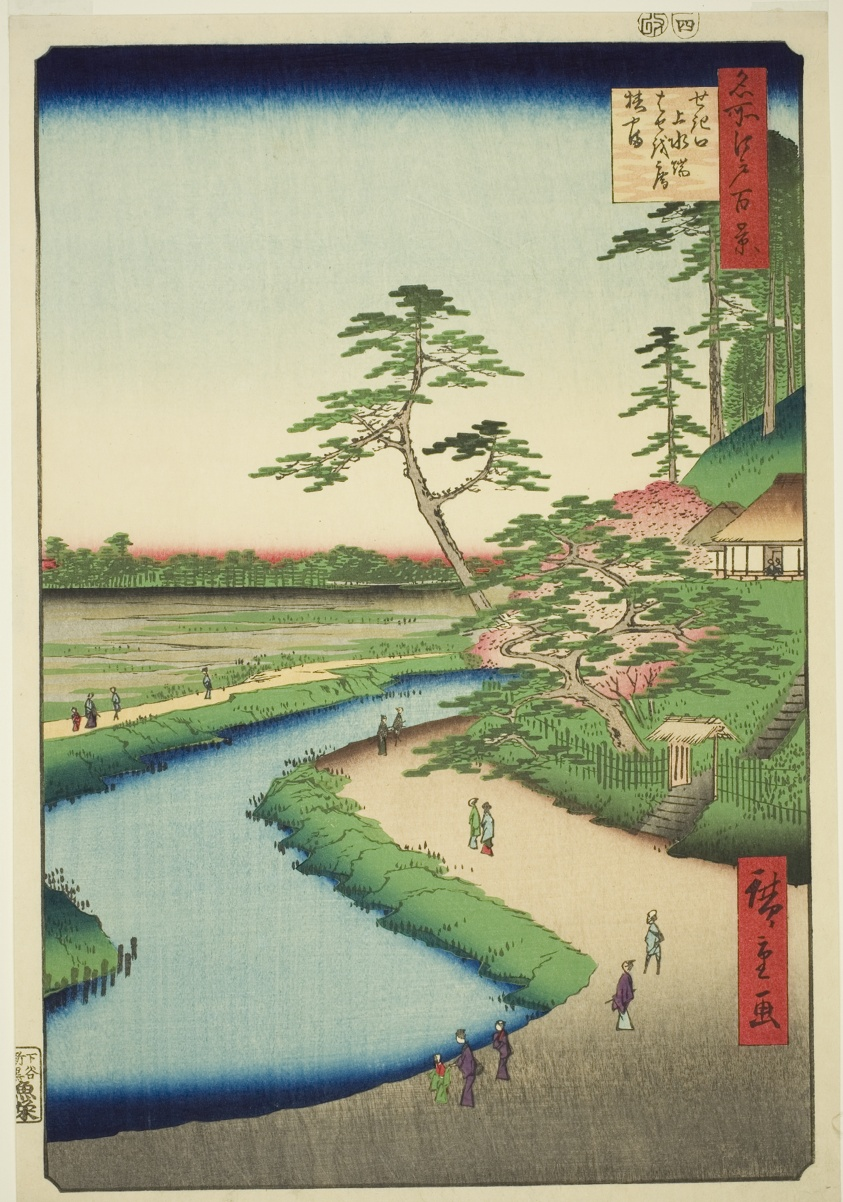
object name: Print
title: Basho's Hut on Camellia Hill Beside the Aquaduct at Sekiguchi (Sekiguchi josui-bata Bashoan Tsubakiyama), from the series "One Hundred Famous Views of Edo (Meisho Edo hyakkei)"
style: Japanese (culture or style)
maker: Utagawa Hiroshige 歌川 広重; Japanese, 1797-1858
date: 1857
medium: Color woodblock print; oban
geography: Japan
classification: woodblock print; print; asian art